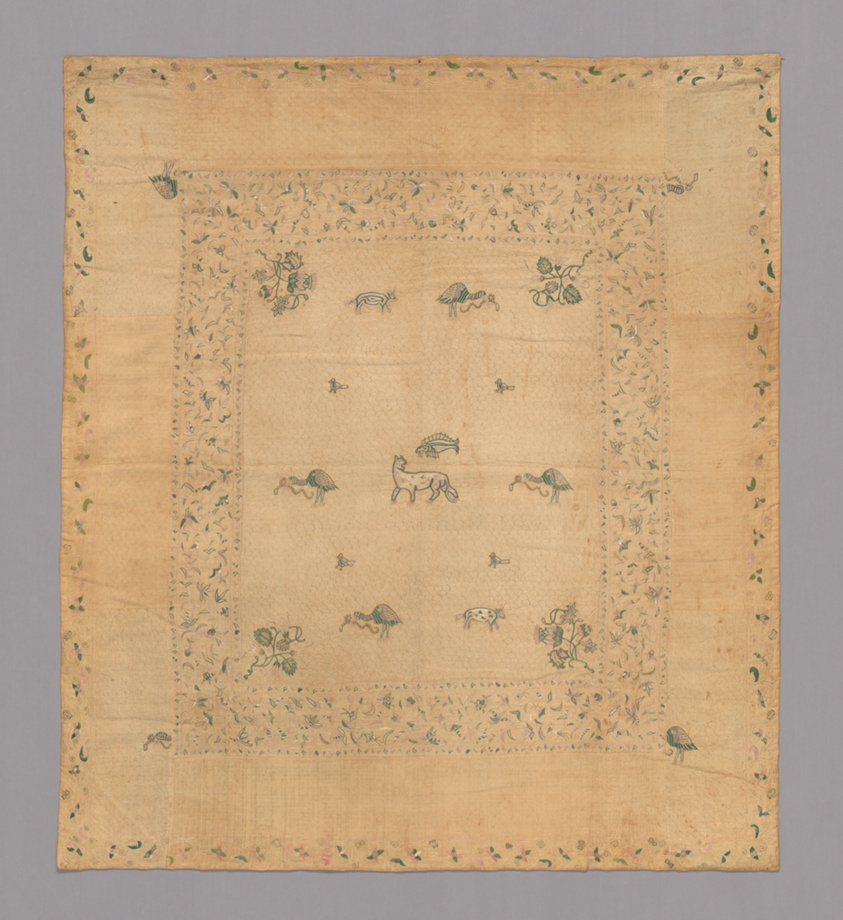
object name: Textile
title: Bedspread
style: regency, european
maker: England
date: Queen Anne period, 1701/25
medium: Linen, tabby; backed with coarser linen, embroidery thru top layer only. Embroidered in silk floss. Stitches: Back, chain, satin, running cross, herringbone, buttonhole, fishbone, speckling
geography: England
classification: textile; needlework - quilt; needlework (visual works)